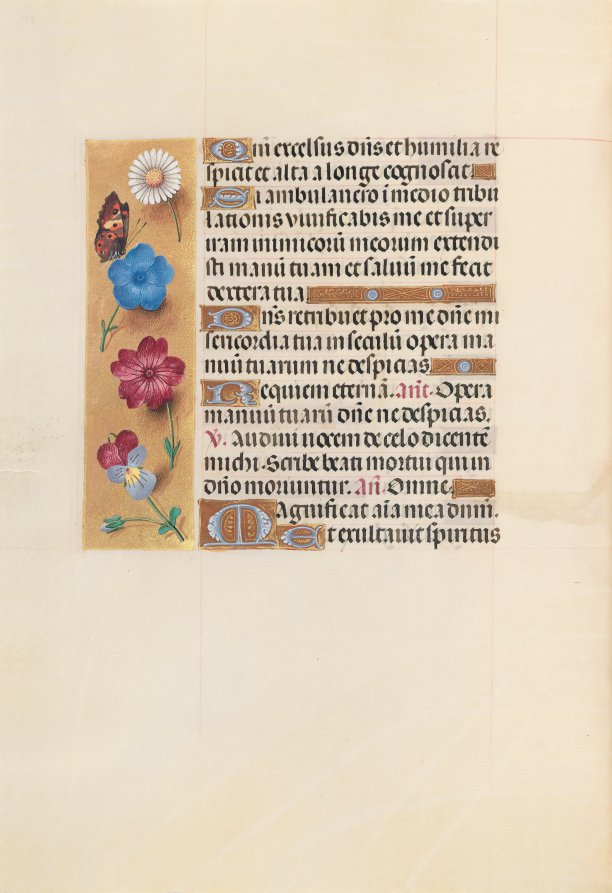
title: Hours of Queen Isabella the Catholic, Queen of Spain: Fol. 223v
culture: Flanders, Ghent and Bruges, late 15th century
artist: Master of the First Prayerbook of Maximillian (Flemish, c. 1444–1519)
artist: and Associates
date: c. 1500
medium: ink, tempera, and gold on vellum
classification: Bound Volume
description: This manuscript was illuminated by a circle of at least five highly organized manuscript painters active in the Flemish cities of Ghent and Bruges. The principal illuminator was Alexander Bening, who painted the majority of the book's miniatures. Manuscripts produced by this circle of artists are renowned for the decoration of their borders, which typically feature a rich variety of realistically-painted flowers, birds, and butterflies. This prayer book, called a book of hours, was intended not for a cleric, but for the private devotions of a lay person-in this case, Isabella the Catholic, Queen of Spain (1451-1504). Isabella's coat of arms embellishes the book's frontispiece. It is unlikely that the book was commissioned by the Queen herself; rather, she probably received it as a diplomatic gift from someone courting her patronage, perhaps Cardinal Francisco Jimenez de Cisneros. A Franciscan friar, Jimenez was dependent upon Isabella for his advancement, first to the post of Queen's confessor in 1492, and then to Archbishop of Toledo in 1495.